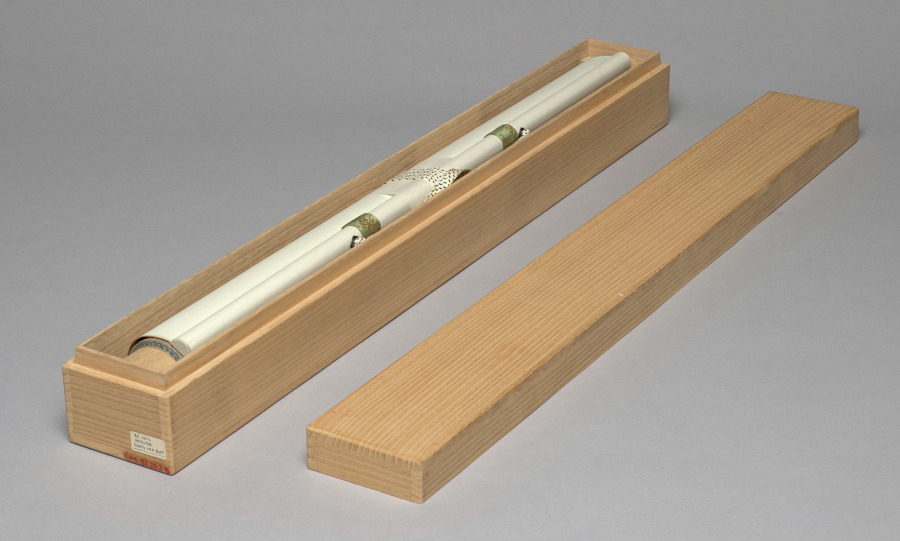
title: Pleasure Boat on the Sumida River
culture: Japan, Edo period (1615–1868)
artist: Teisai Hokuba (Japanese, 1771–1844)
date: 1800s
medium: Hanging scroll; ink and color on silk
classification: Painting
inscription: Signed: Teisai. Sealed: Teisai go [no] in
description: After a major fire in Edo (now Tokyo), the Yoshiwara licensed brothel district was relocated to an area accessed via boat along the Sumida River, giving rise to many compositions depicting travel there. Here, attendants with checkered robes serve refreshment to a client. A figure at the fore of the boat tends to the kitchen. A courtesan at the aft, or rear, surveys the river scene. Acquaintances converse in modest commuter boats, and fishers put in to a tiny island. The boat is near the entrance to the San’ya Canal, where pleasure-seekers would disembark.